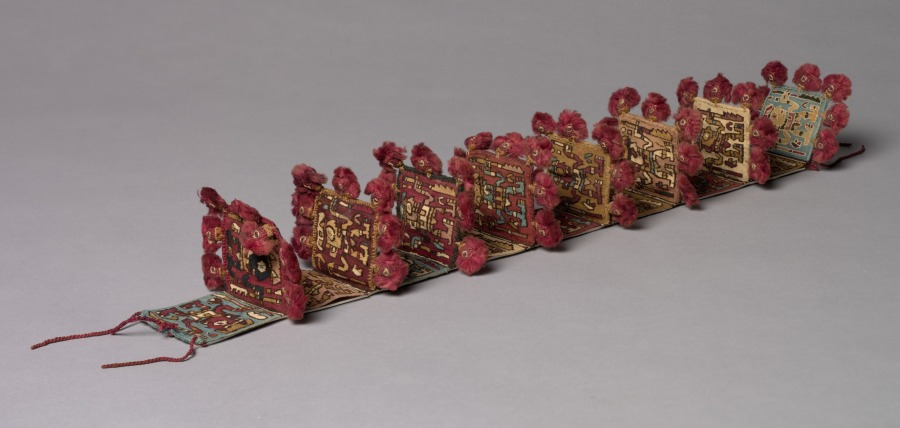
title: Band (Headband?)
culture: Central Andes, Moche-Wari Style, mid-7th to mid-9th century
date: c. 650–850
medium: Camelid fiber (alpaca; weft) and cotton (warp); tapestry weave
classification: Textile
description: This jewel-like textile, perhaps the only one of its kind, is made from a single band accordion-folded to form tabs, each edged with lush red tassels. Repeated in different colors down its length is the image of a warrior who holds an axe in one hand and a jagged, club-like object in the other. The reversed orientation of several of the warriors may be the result of the weaving method.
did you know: This unusual band may have been worn as a headband.